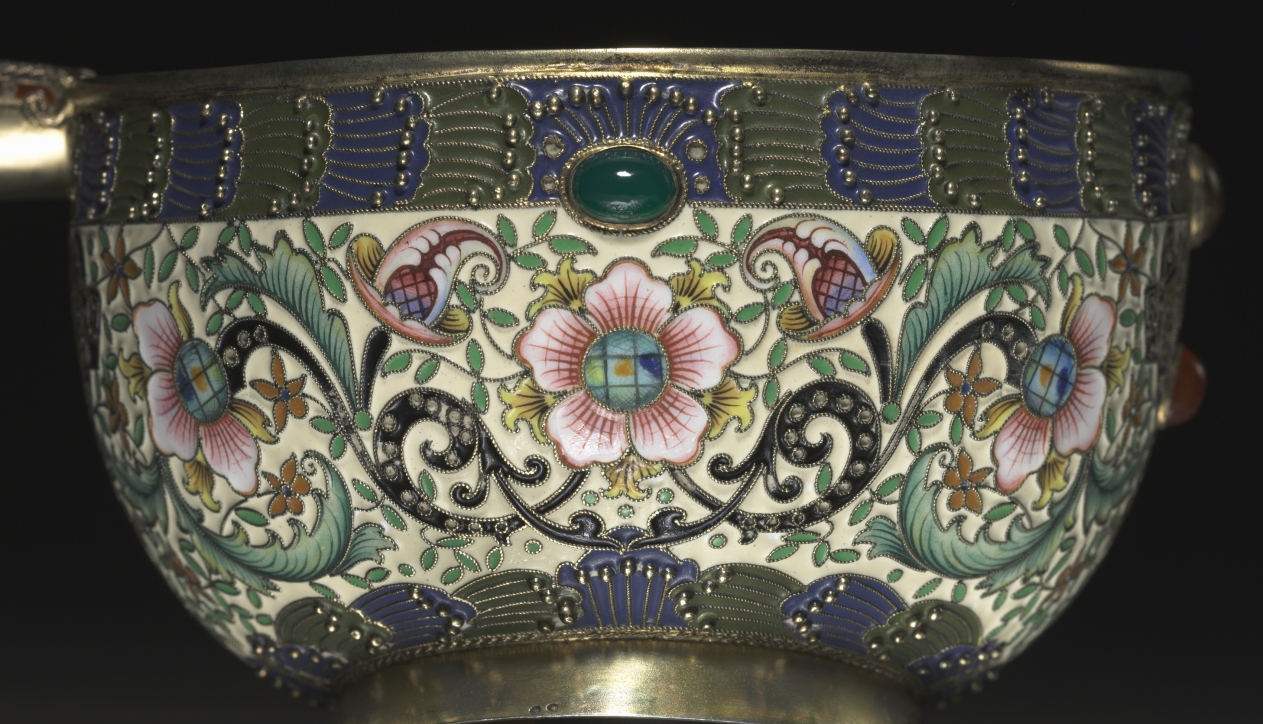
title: Kovsh (Cup)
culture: Russia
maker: House of Fabergé (Russian, 1842–1918)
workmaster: Feodor Ivanovich Rückert (Russian, 1840–1917)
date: 1896–1906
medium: silver gilt, enamel, cabochon gems, chrysoprases, carnelians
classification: Miscellaneous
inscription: inscribed on bottom: "CH" in script monogram (owner's initials).